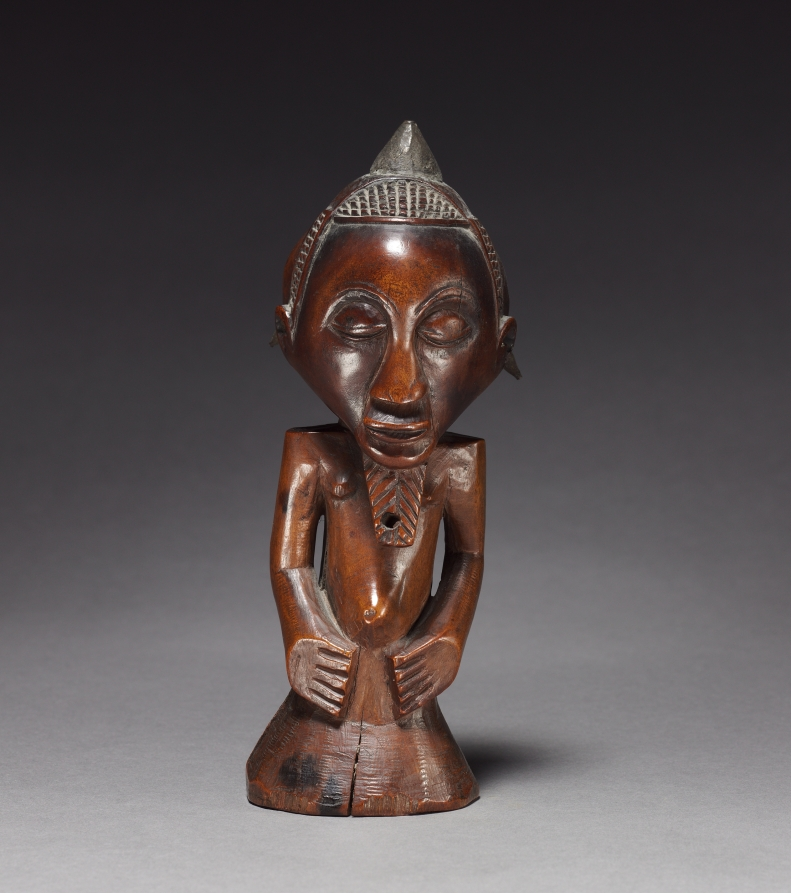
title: Half-Figure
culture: Africa, Central Africa, Democratic Republic of the Congo, probably Kusu-style maker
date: late 1800s–early 1900s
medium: Wood and iron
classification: Sculpture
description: Iron tacks inserted into the lobes of the hairdo indicate that this sculpture was originally empowered with magical and medicinal substances. Thus charged, the figure would have been used in divination and was related to a powerful association known as Bugabo. Members specialized in healing, hunting, and fighting crime.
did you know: This figure would have been used in a powerful association known as Bugabo, specializing in healing, hunting, and fighting crime.